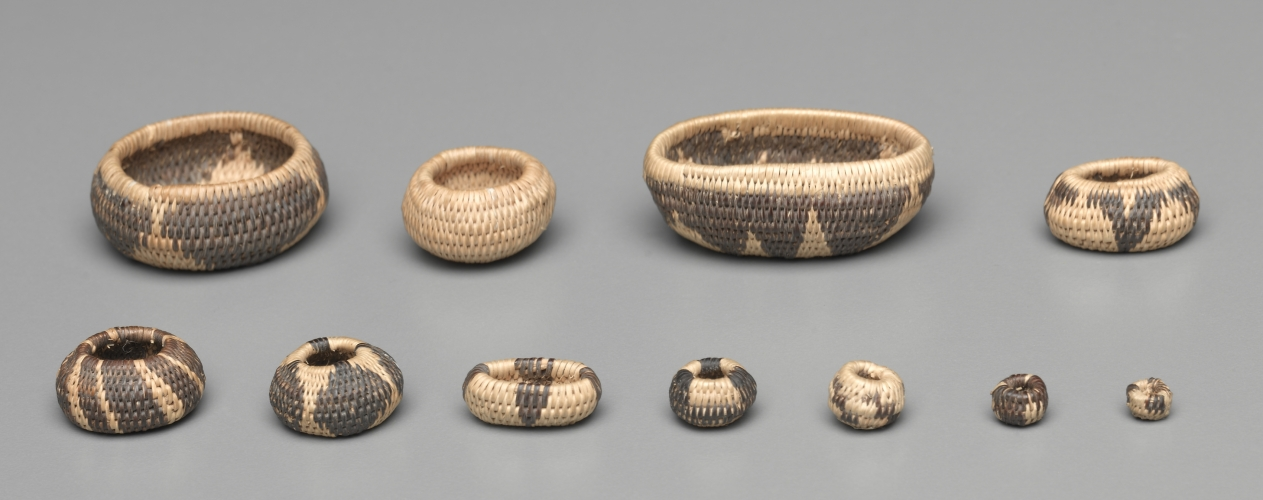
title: Miniature Basket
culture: America, Native North American, Southwest, Arizona, Akimel O'odham (Pima), Unassigned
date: before 1923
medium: plant fiber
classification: Basketry